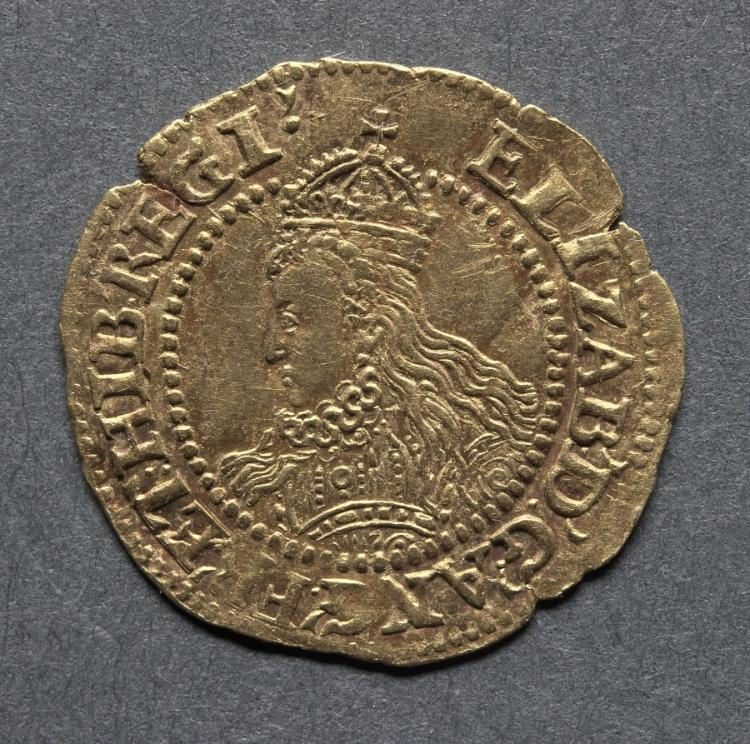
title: Halfcrown: Elizabeth I (obverse)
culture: England, Elizabeth I, 1558-1603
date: 1592–95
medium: gold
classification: Coins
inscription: ELIZAB; D; G; ANG; FR; ET. HIB; REGI